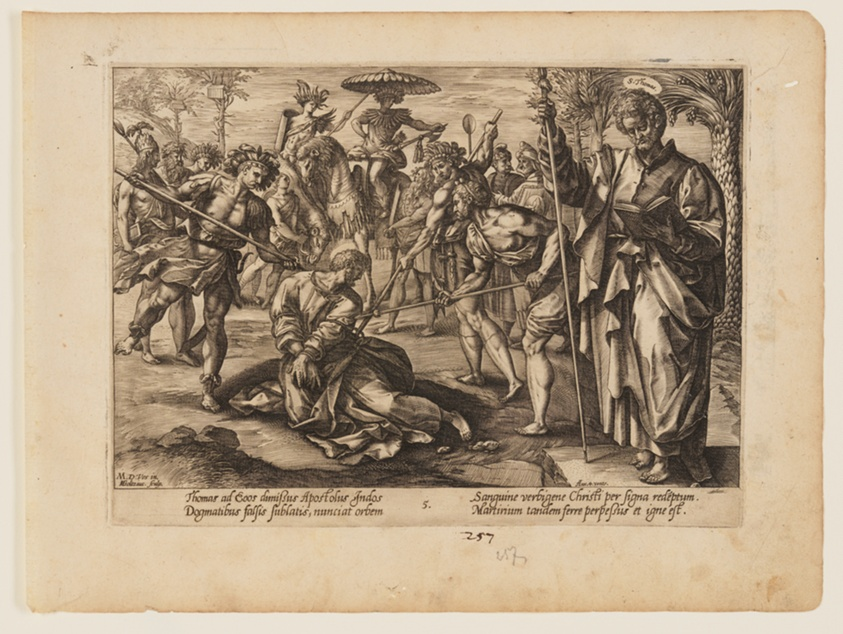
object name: Print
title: The Martyrdom of St Thomas, from The Martyrdom of Christ and the Apostles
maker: Hendrick Goltzius (Dutch, 1558–1617); after Maarten de Vos (Flemish, 1532–1603); published Hieronymus Cock (Netherlandish, c. 1510–1570)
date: c. 1578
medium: Engraving on ivory laid paper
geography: Netherlands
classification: engraving; paper; print; prints and drawing